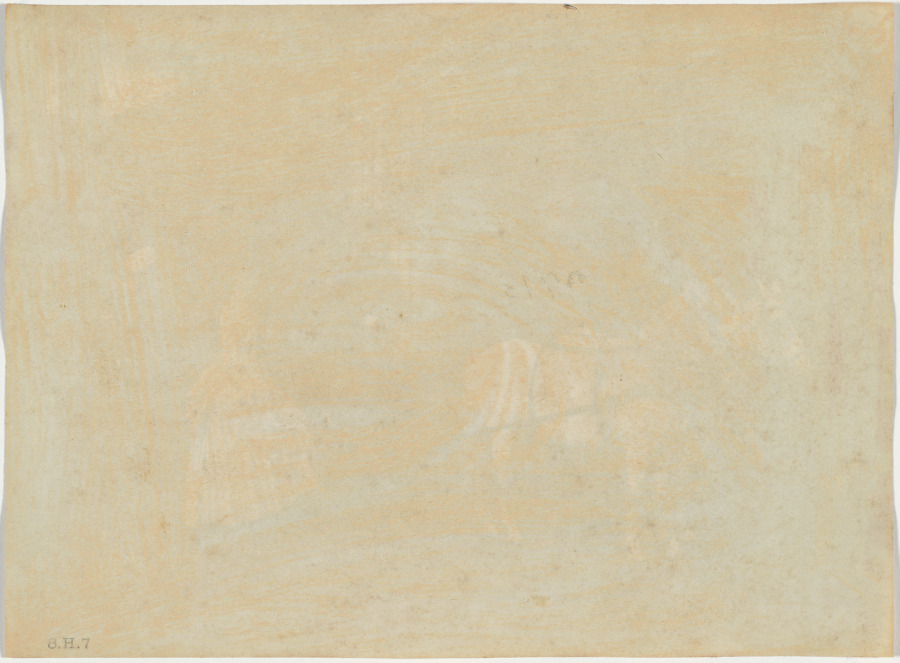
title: Mrs. and Miss Lyall, Shimla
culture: India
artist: Raja Deen Dayal (Indian, 1844–1905)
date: 1887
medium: albumen print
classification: Photograph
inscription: Stamped in black ink on verso: “8.H.7”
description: A number of Deen Dayal’s Simla portraits include rickshaws, which were items of great novelty, being found in India only in Simla at the time. The two-wheeled, human-powered passenger cart first appeared in Japan around 1870 and was introduced to Simla around 1880 by a Scottish missionary. The town’s steep hills required four drivers, two to pull and two to push. Horse-drawn buggies were another common means of transport. Miss Lyall and Mrs. Lyall also appear in the photograph, suggesting that they had a significant personal relationship with the purchaser of the album.